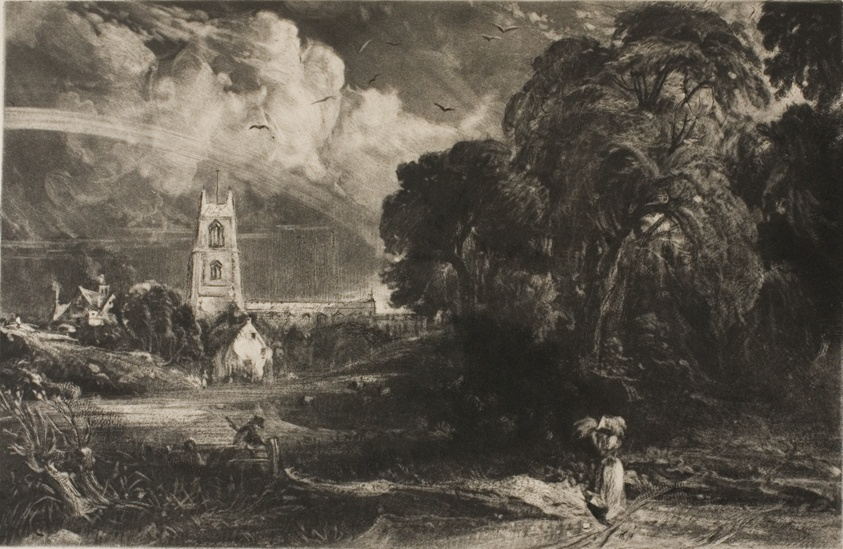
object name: Print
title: Stoke by Neyland, Suffolk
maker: David Lucas (English, 1802-1881); after John Constable (English, 1776-1837)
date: 1830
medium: Mezzotint in black ink on heavy ivory wove paper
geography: England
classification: mezzotint; print; prints and drawing